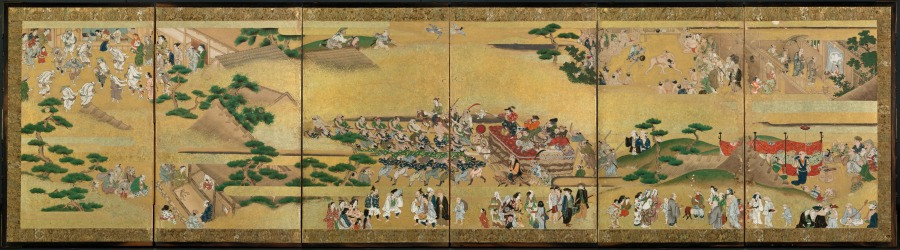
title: Festival Scenes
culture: Japan, Edo period (1615–1868)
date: 1600s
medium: one of a pair of six-panel folding screens; ink, color, gold, and gold leaf on paper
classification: Painting